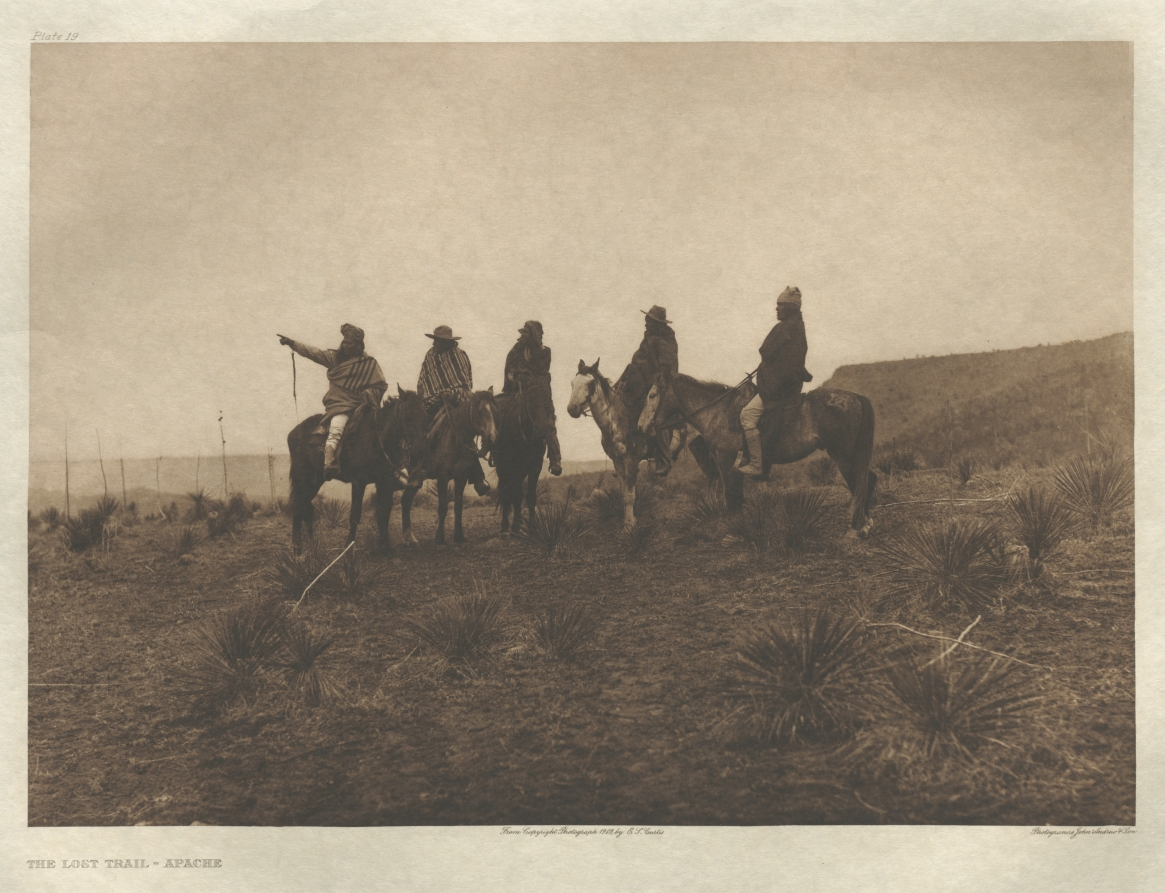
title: Portfolio I, Plate 19: The Lost Trail-Apache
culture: America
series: The North American Indian: being a series of Portfolios picturing and describing the Indians of the United States, the Dominion of Canada, and Alaska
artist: Edward S. Curtis (American, 1868–1952)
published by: The University Press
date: 1903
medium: photogravure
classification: Portfolio